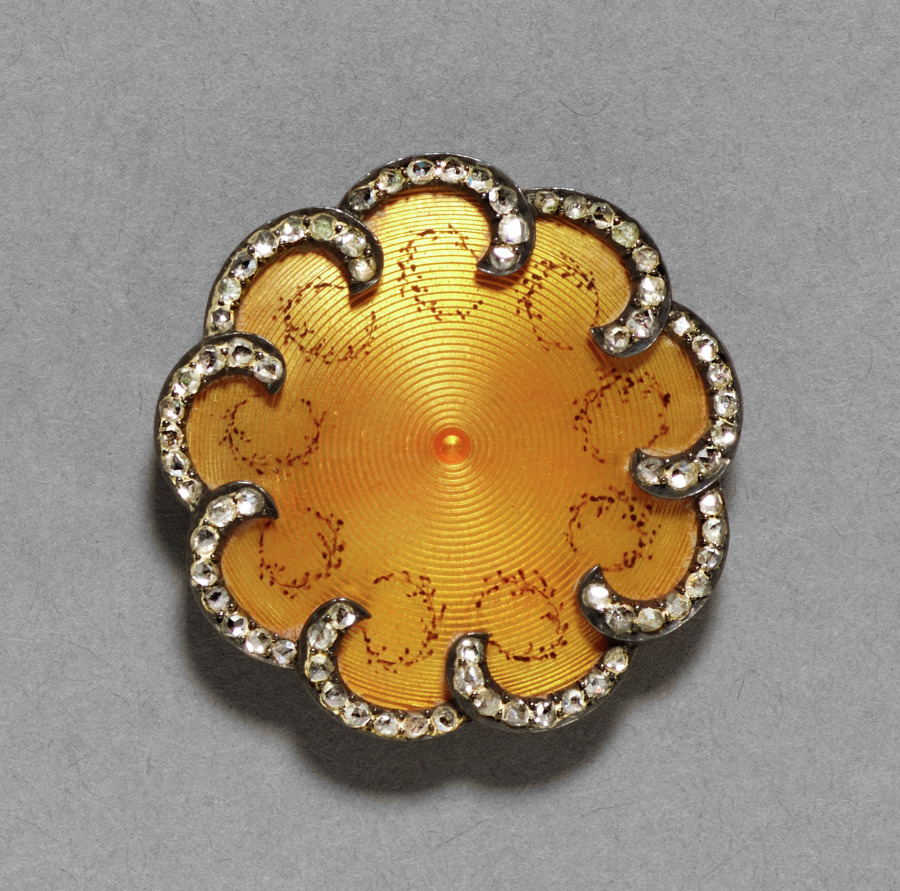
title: Button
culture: Russia, St. Petersburg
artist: firm of Peter Carl Fabergé (Russian, 1846–1920)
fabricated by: August Wilhelm Holmström (Russian, 1929–1903)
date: after 1896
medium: gold, enamel, diamonds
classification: Miscellaneous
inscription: double-headed eagle; Fabergé; St. Petersburg, Moscow (all in Cyrillic; inside lid of box).